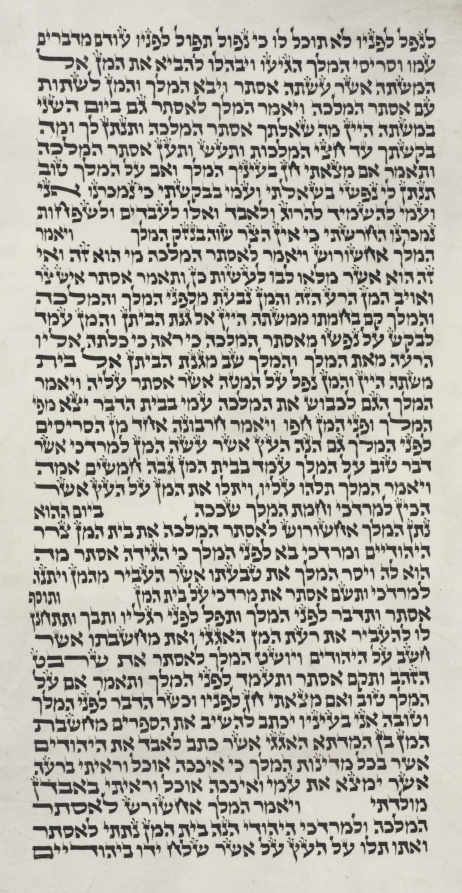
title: Scroll of Esther for the Purim Festival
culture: Europe (Eastern?), Hebrew, 19th century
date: c. 1850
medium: ink on vellum (eight columns, 39 lines of text on three membranes)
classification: Manuscript